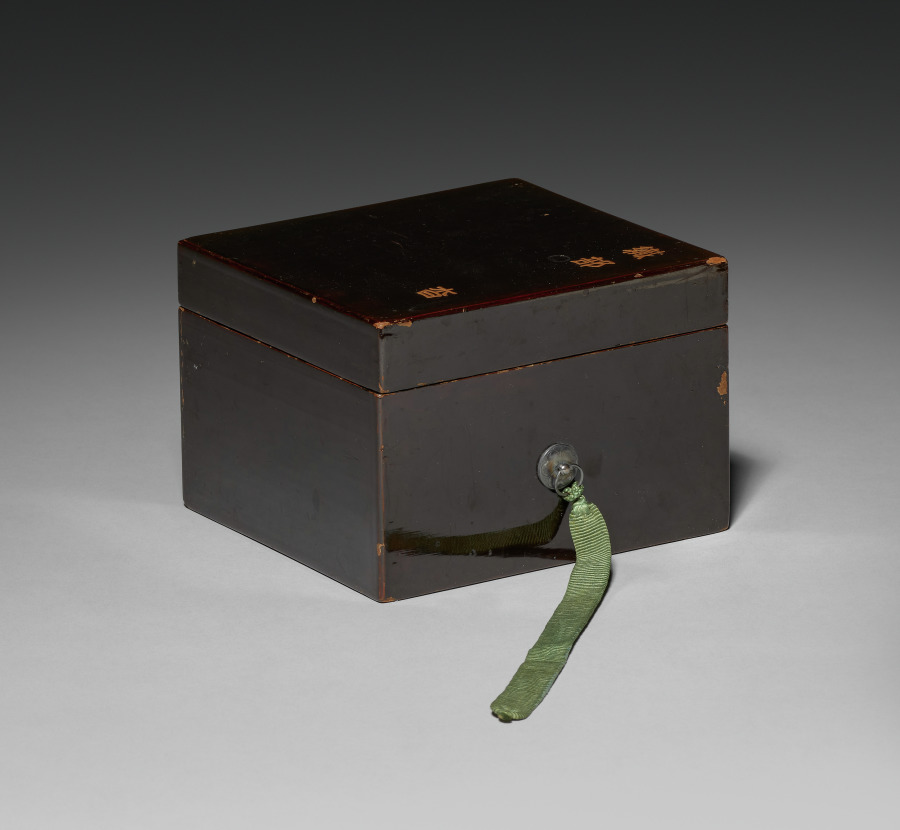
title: Clog-shaped Teabowl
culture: Japan, Momoyama period (1573–1615)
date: early 1600s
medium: Glazed stoneware (Mino ware, Oribe type)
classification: Ceramic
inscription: Mark: cross on base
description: Tea gatherings are fundamental to Japanese culture. Teabowls like this one are the most important objects used in tea practice. Its oblong shape and bold abstract designs are the signature style of the time period in which it was produced. That style is called Oribe, named for the tea master who championed the aesthetic.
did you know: Oribe is a government position. It means the person in charge of textiles.